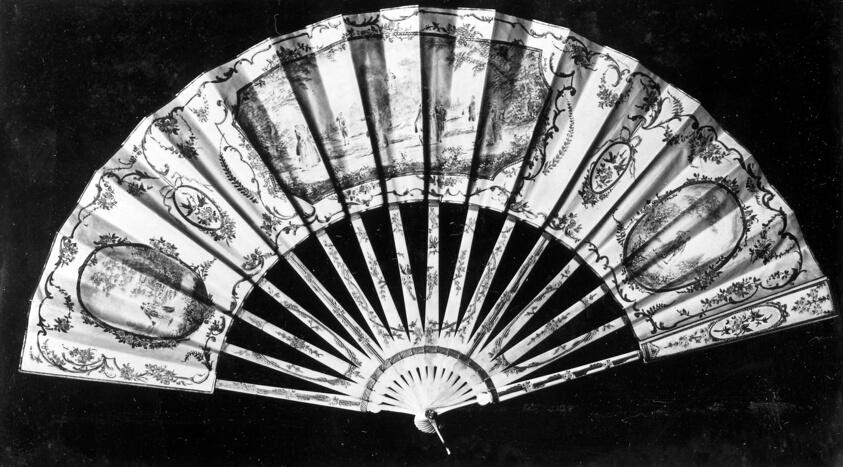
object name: Costume and Accessories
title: Fan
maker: France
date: 1875/1900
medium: Carved and gilded ivory sticks and guards; painted paper mount, backed with gauze; rhinestone rivet; metal loop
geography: France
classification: textile; fan - paper; costume accessory - folding fan; costume